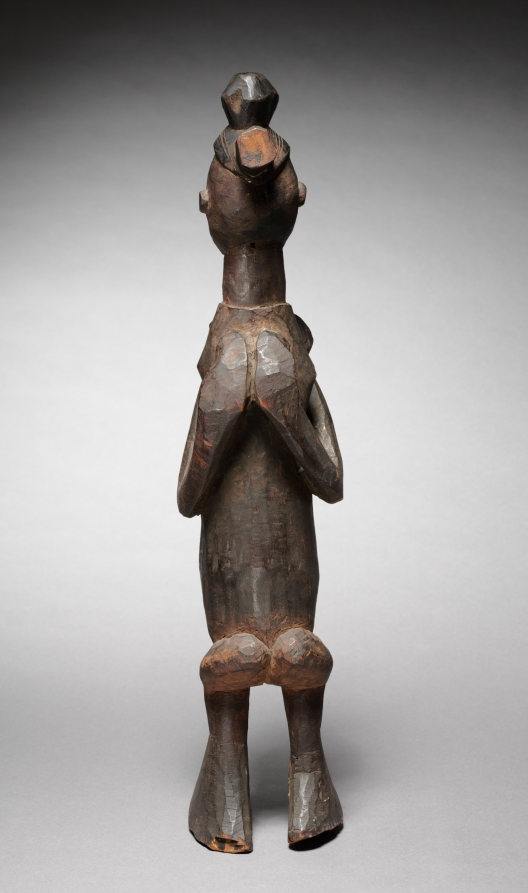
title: Male Figure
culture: Africa, Central Africa, Democratic Republic of the Congo, Yaka-style maker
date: 1900s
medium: wood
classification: Sculpture